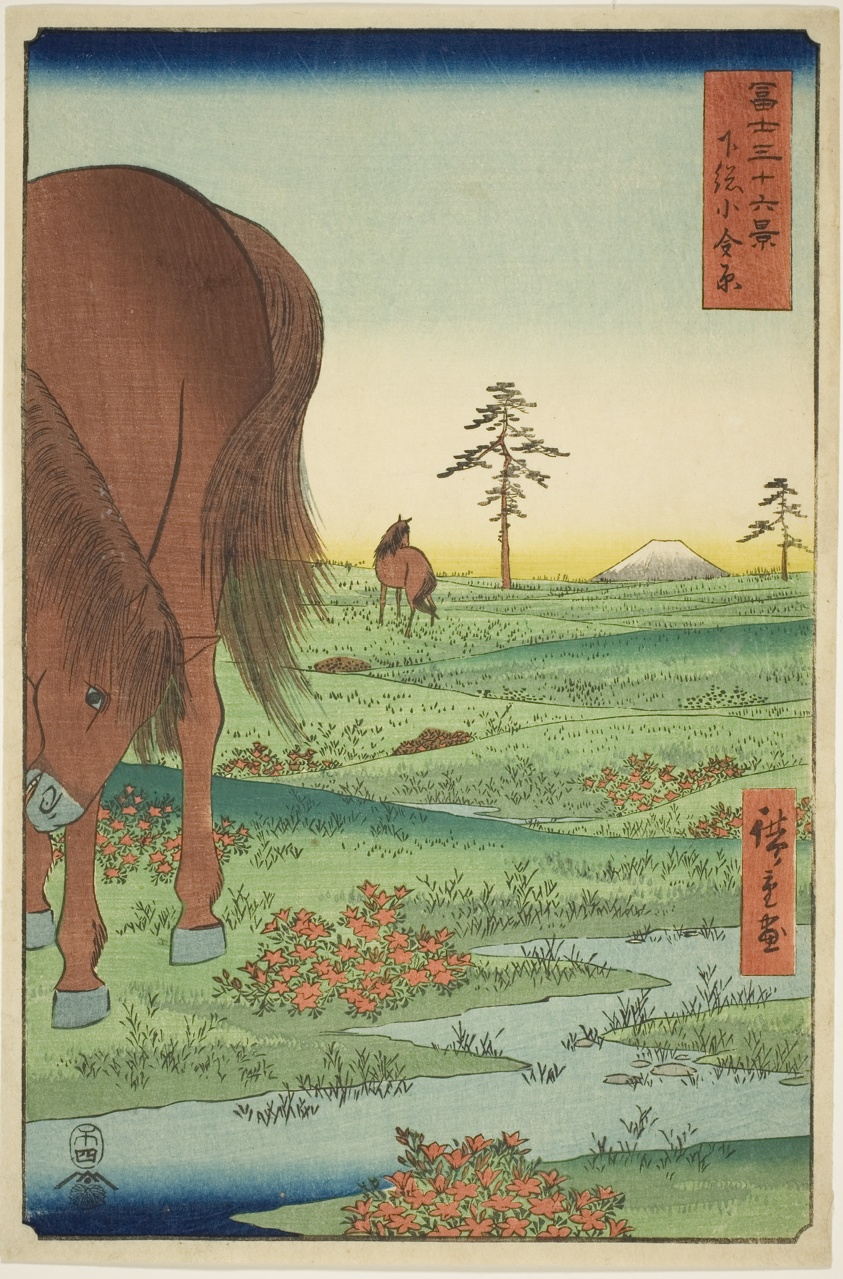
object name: Print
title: Kogane Plain in Shimosa Province (Shimosa Koganehara), from the series "Thirty-six Views of Mount Fuji (Fuji sanjurokkei)"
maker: Utagawa Hiroshige 歌川 広重; Japanese, 1797-1858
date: 1858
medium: Color woodblock print; oban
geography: Japan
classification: woodblock print; print; asian art